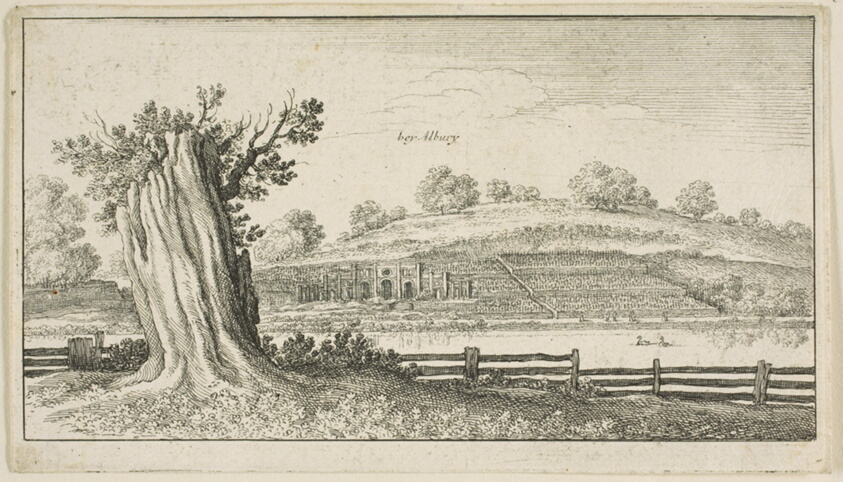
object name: Print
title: Albury with Tree-Stump in Foreground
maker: Wenceslaus Hollar (Bohemian, 1607-1677)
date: c. 1645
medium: Etching on ivory laid paper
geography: Bohemia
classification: etching; print; prints and drawing